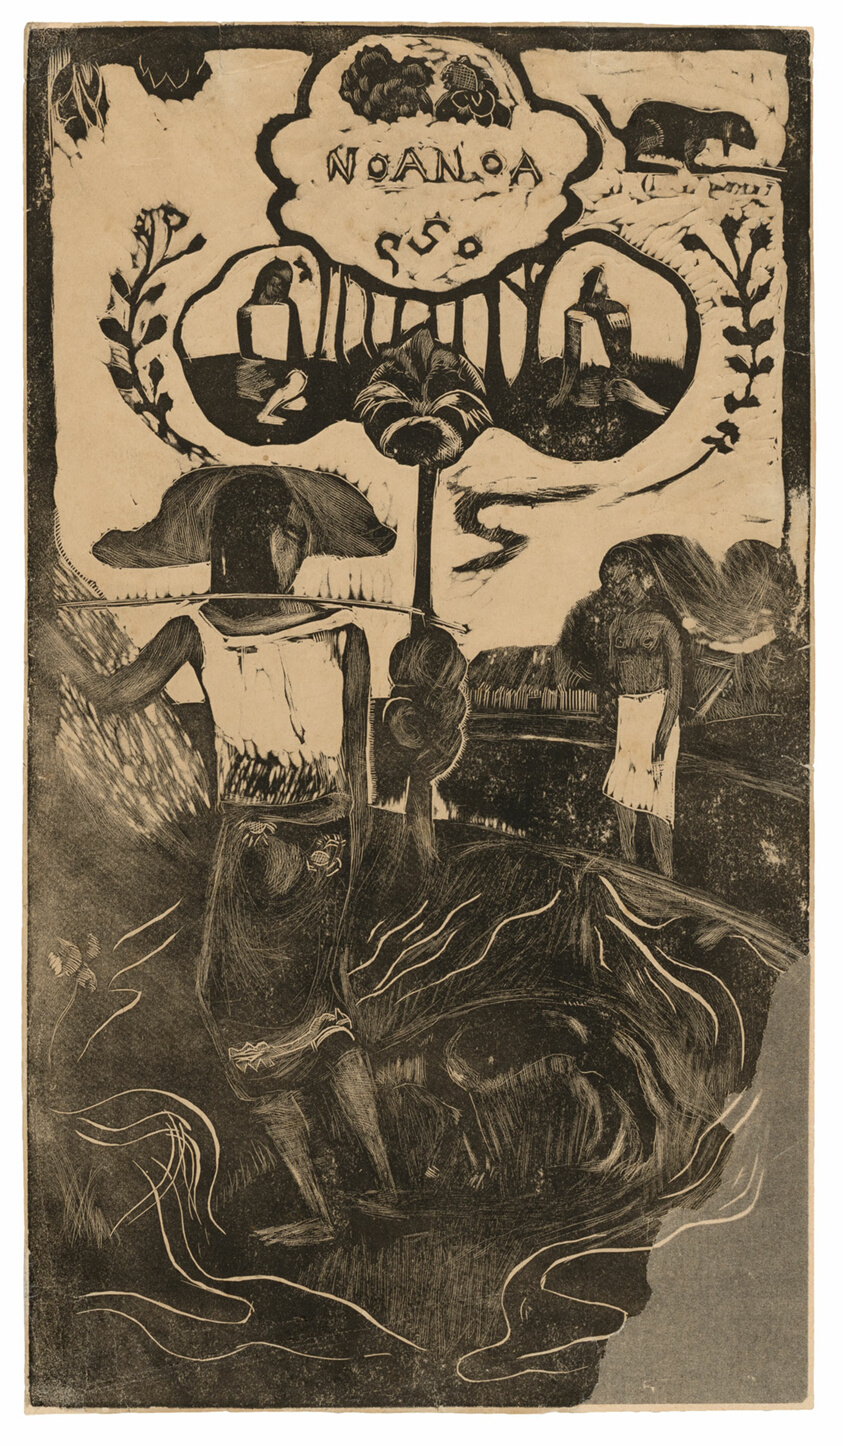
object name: Print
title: Noa Noa (Fragrant), from the Noa Noa Suite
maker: Paul Gauguin (French, 1848-1903)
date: 1893/94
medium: Wood-block print in black, with a transferred twill impression, on tan wove paper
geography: France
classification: woodcut; print; prints and drawing